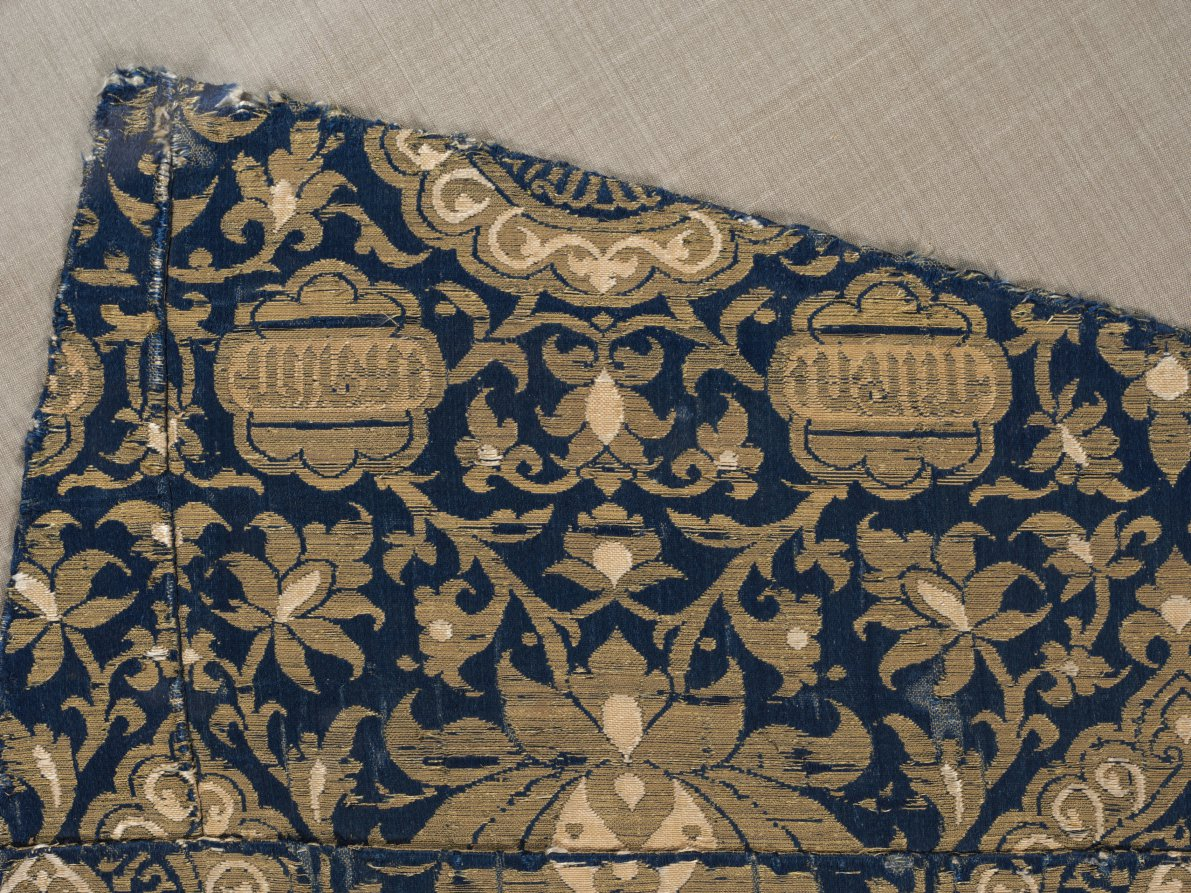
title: Mantle for a Statue of the Virgin with Lotus Blossoms and Medallions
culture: Egypt and Spain; Egypt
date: c. 1430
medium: Silk and gilt-metal thread: lampas weave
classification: Textile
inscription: Glory to our master, the sultan, the king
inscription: The sultan, the king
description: This costly royal silk with extensive gold thread was woven in Egypt and gifted or exported to Spain, where it was pieced into this mantle for a statue of the Virgin, probably to be worn during festivals and processions. The sturdy silk brocade foundation cloth was also woven with a lighter weight silk damask with a repeating mirror image. Therefore, the Arabic inscription in the medallions reads both forward and backward: Glory to our master, the sultan, the king. The inscribed lobed roundels say The sultan, the king.